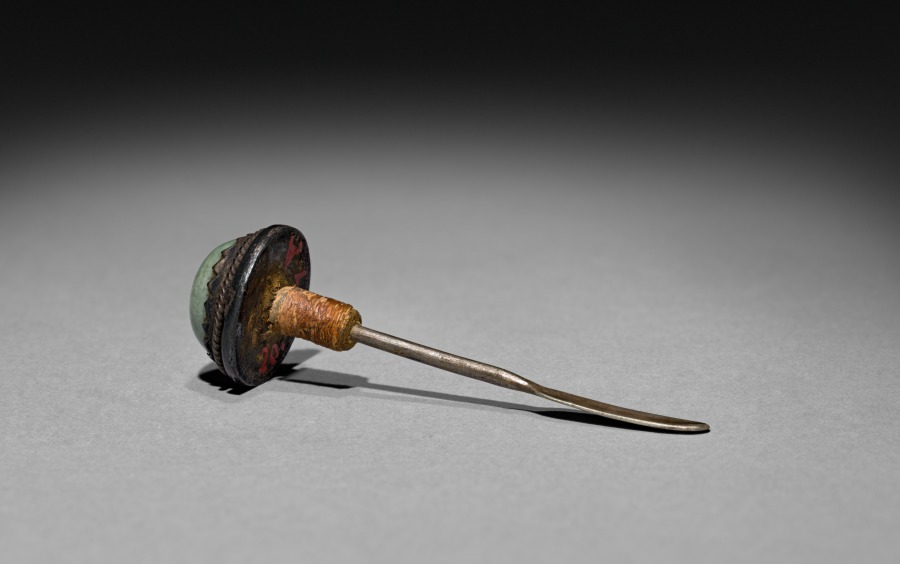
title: Snuff Bottle (stopper)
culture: China, Qing dynasty (1644-1911)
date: 1644–1911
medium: glass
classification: Glass